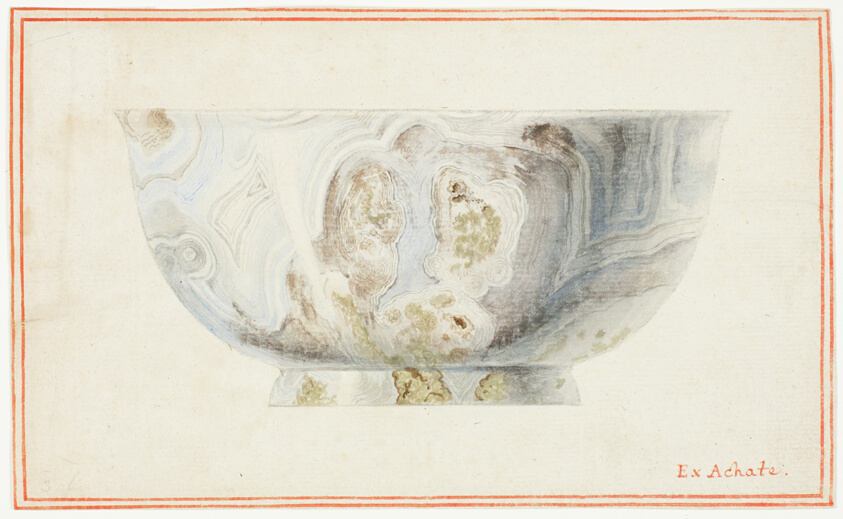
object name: Drawing and Watercolor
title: Agate Bowl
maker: Giuseppe Grisoni (Italian, born Flanders, 1699-1769)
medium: Gouache over black chalk, on ivory laid paper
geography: Flanders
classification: gouache; watercolor; drawings (visual works); prints and drawing